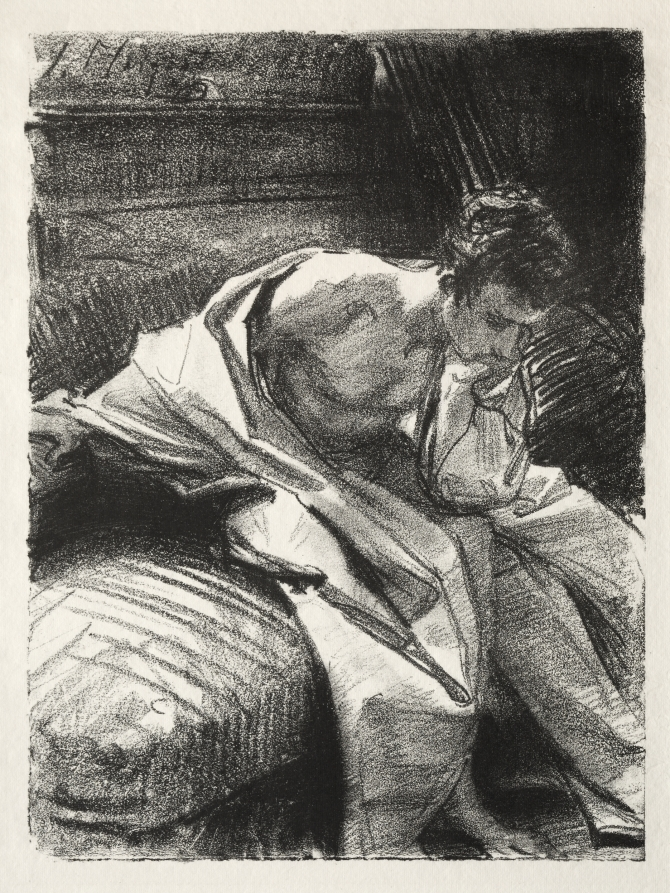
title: A Study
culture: America, late 19th-early 20th century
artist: John Singer Sargent (American, born Italy, 1856–1925)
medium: lithograph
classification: Print